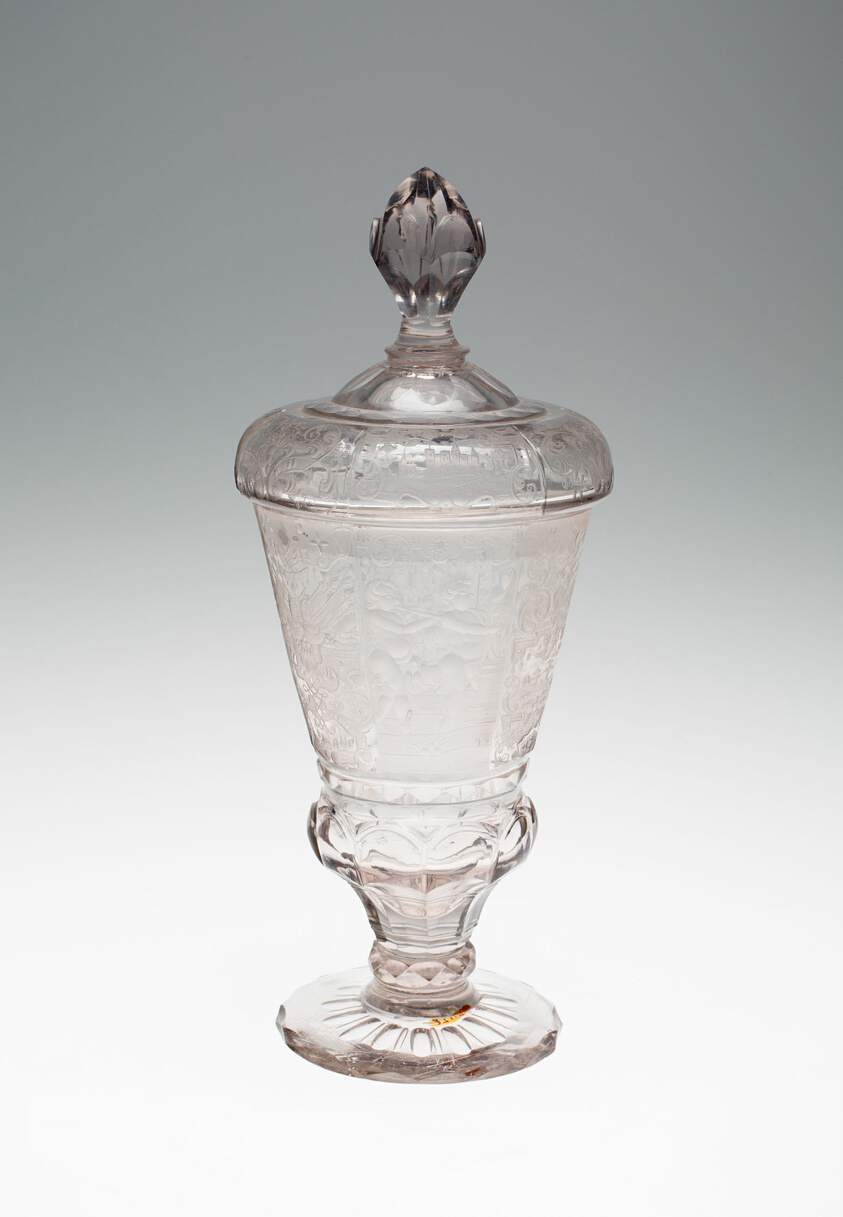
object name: Glass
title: Goblet with Cover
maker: Germany, Schleswig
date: c. 1730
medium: Glass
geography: Schleswig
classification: drinking vessel; glass; european decorative arts